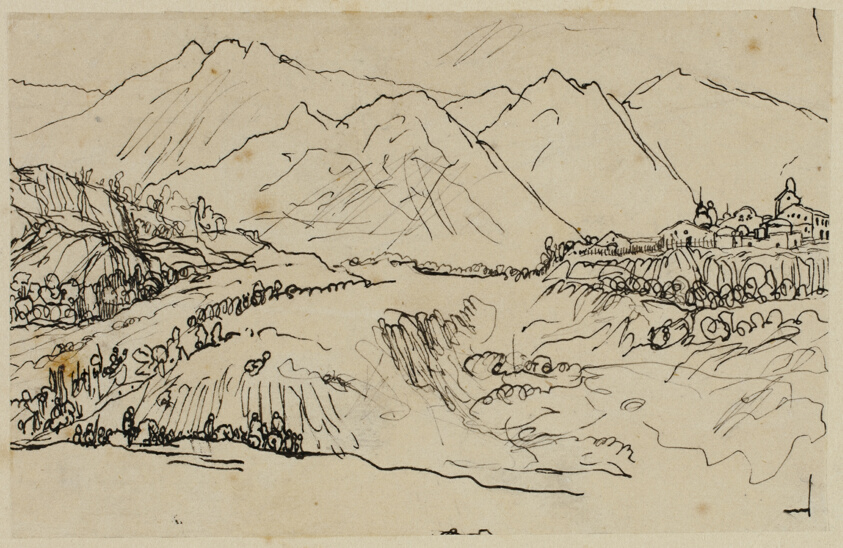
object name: Drawing and Watercolor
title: Village in Mountains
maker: Rodolphe Bresdin (French, 1825-1885)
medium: Pen and black ink, on buff tracing paper, laid down on buff wove paper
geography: France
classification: pen and ink drawings; drawings (visual works); prints and drawing